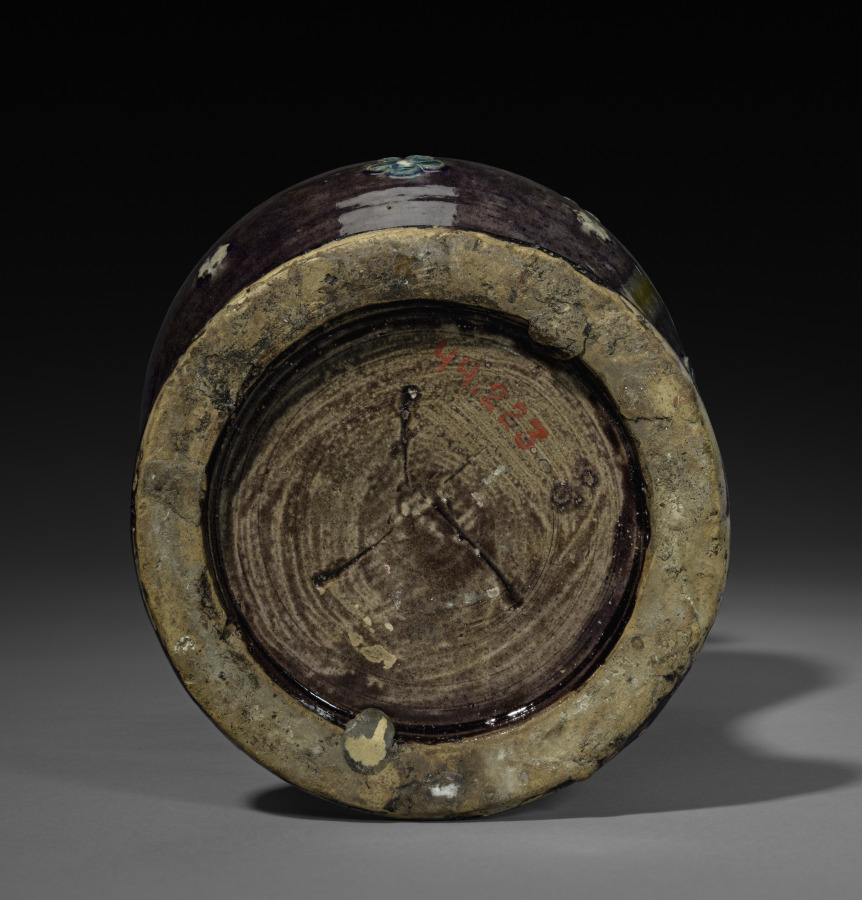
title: Vase with Branch of Plum Blossoms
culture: China, Shanxi province, Ming dynasty (1368-1644)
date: 1500s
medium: Glazed stoneware with molded and modeled decoration, Fahua ware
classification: Ceramic